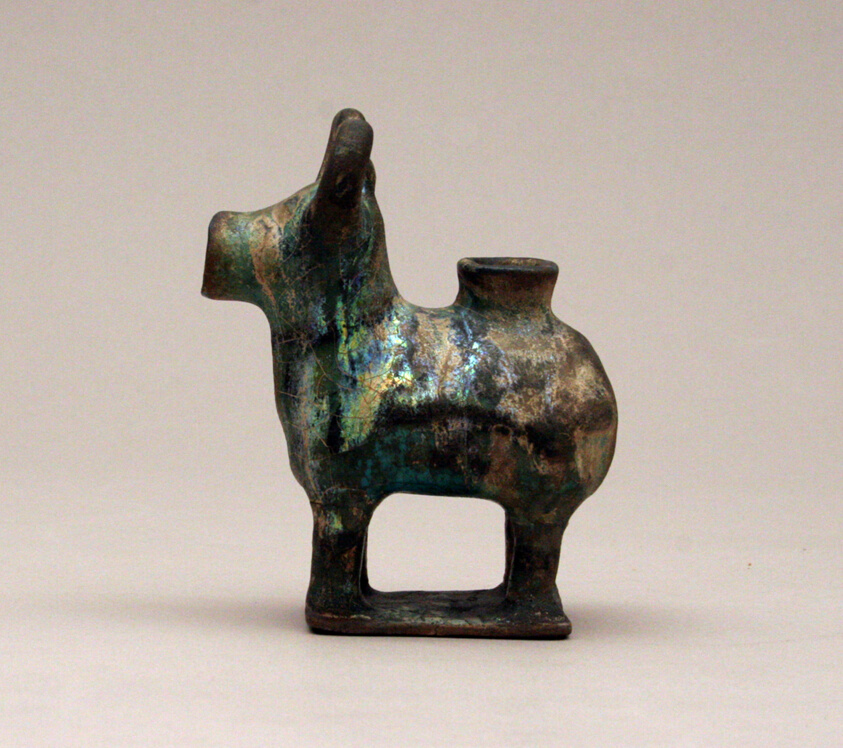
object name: Ceramics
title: Zoomorphic Vessel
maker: Iran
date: Early 13th century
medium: Fritware painted in black under a transparent turquoise glaze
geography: Iran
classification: ceramics; asian art; decorative arts